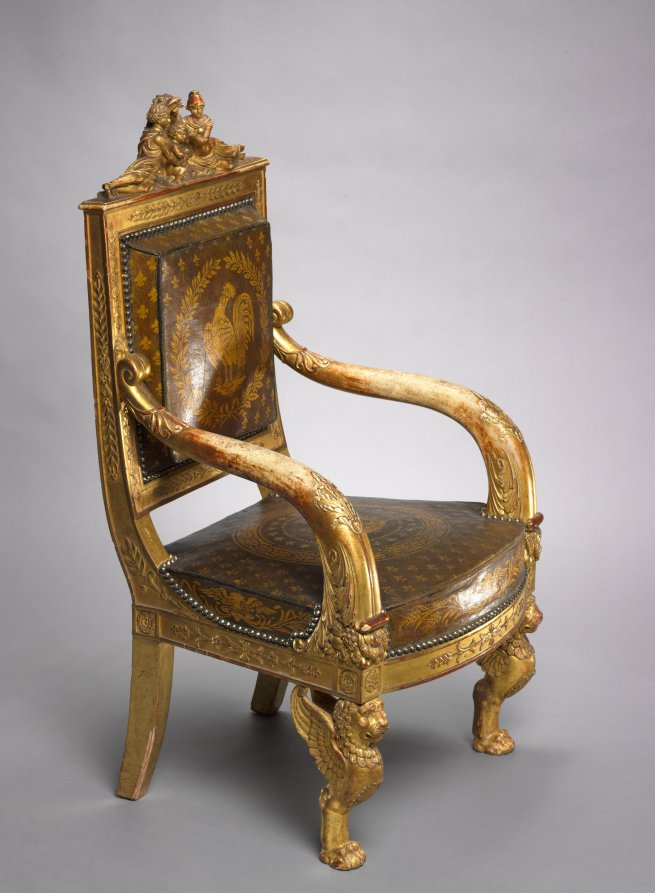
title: Child's Throne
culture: France, Paris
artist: Pierre-Marie Balny le Jeune (French, 1832)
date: 1822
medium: carved and gilded wood, leather upholstery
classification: Furniture and woodwork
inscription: inscribed with stencils inside back rail: BLONDEL TAPISSIER/RUE ST. ANTOINE N 72 1822 inscribed in ink lower edge back rail: 12 JANVIER 18[22?]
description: This chair was made for the young, presumed successor to the French throne who ruled briefly as Henri V in 1830, the last of the direct Bourbon line. He is depicted at the center of the top rail protected by female figures representing France and Minerva, the Roman goddess of wisdom. Fleurs-de-lis and the Gallic rooster, symbols of French royalty and the French people, decorate the upholstery.